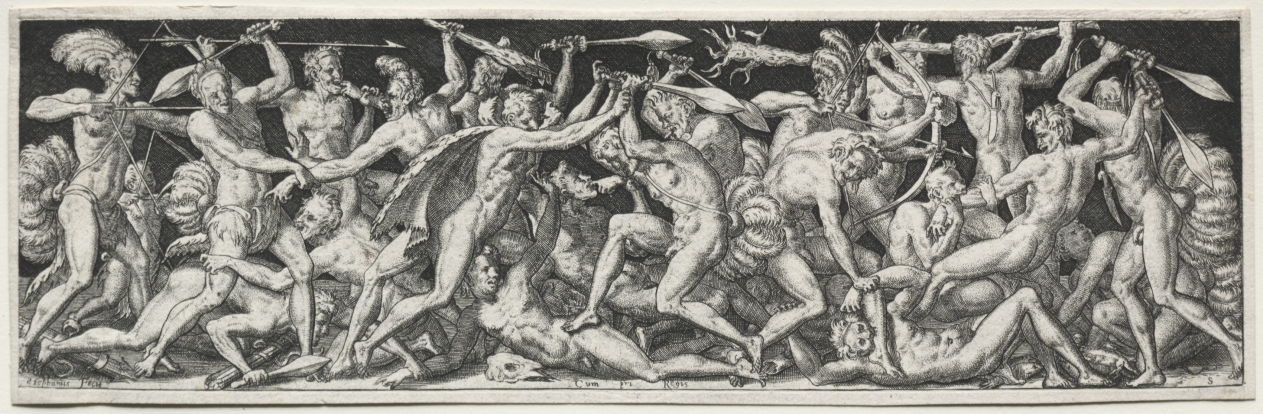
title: Combats and Triumphs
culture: France, 16th century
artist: Etienne Delaune (French, 1518/19-c. 1583)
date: c. 1550–72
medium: engraving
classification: Print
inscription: lower right, in plate: S[backwards]tephanus Fecit ; lower center, in plate: Cum pri Regis ; lower right, in plate: S ; verso, lower right, in graphite: 287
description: Etienne Delaune (French, 1518/19-1583) Combats and Triumphs, probably 1560s Engravings Gift of Leonard C. Hanna 1924.671-.674 The Triumph of Bacchus Battle of Men and Animals Combat of the Naked Men Battle of the Centaurs and the Lapiths The four prints shown here come from a series of twelve known as the Combats and Triumphs. The friezelike composition reflects the artist's study of marble relief carvings on Greek and Roman sarcophagi (coffins), here reduced to a preciously small setting. Against a flat, stagelike background, Delaune's balletic warriors engage in a Mannerist version of artificial war. Etienne Delaune was inspired by the art created at Fontainebleau, but he worked in Paris and then Strasbourg during the late 1500s. His small, exquisitely executed engravings reflect his training as a goldsmith and his work as a medallist.